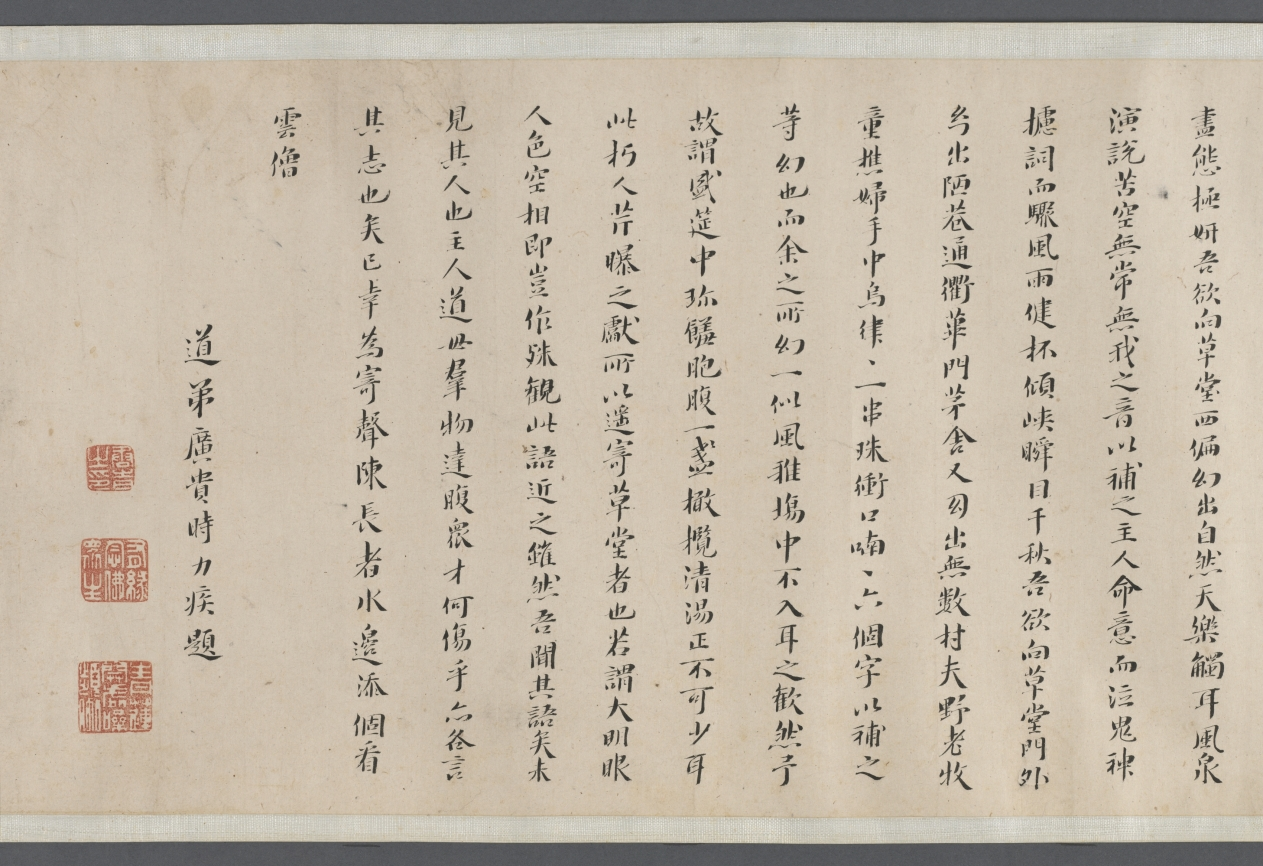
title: Spring Rain Thatched Hut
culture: China, Qing dynasty (1644-1911)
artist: Wang Jianzhang (Chinese, active 1621–1662)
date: 1650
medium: handscroll, ink on paper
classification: Drawing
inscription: Title by Wu Zhiying 吳芝瑛 (1868–1933), dated 1910.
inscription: 春雨草堂圖。庚寅仲春，為紫玄社兄畫於若耶溪上。 仲初王建章。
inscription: 12 colophons by Gong Weiliu’s 宮偉鏐 (1611–1680) contemporaries: Fang Gongqian 方拱乾 (1596–1667, jinshi of 1628); Jiang Cai 姜埰 (1607–1673); Liang Yizhang 梁以樟 (1608–1665); Du Shaokai 杜紹凱 (also named Du Jie 杜岕, 1617–after 1689), dated 1648; Zhao Kaixin 趙開心 (d. 1663), dated 1647; Zhao Erbian 趙而忭 (d. 1658); Yu Yaoguang 余耀光, dated 1649; Yao Quan 姚佺, dated 1648; Chen Taisun 陳台孫 (b. 1611, jinshi of 1640); (Monk) Shao 韶; Du Zhujin 杜祝進; and Tang Shi 唐時.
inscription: 此研田莊居士王建章為先太史紫元公所作春雨草堂圖也。居士字仲初，明崇禎間人，與先太史及惲香山相友善。喜畫佛像，自謂不讓李公麟。山水祖述董源，筆力雄健，有不可羈勒之概。香山稱其墨有五采，非世人所知。然性廉重，非同志不輕落筆，人得其寸圖尺縑，必相與忻賞，如獲蜼彝兕敦，非人世間物也！見先太史筆記，此圖寫雨景，而氣韻生動，勃勃於不能止。每一展覽，覺滿紙雲烟，墨瀋猶濕，如寫吾先人胸中未盡之邱壑也。圖後題詠，多一時名手，想見文采風流之盛。迄今二百餘年，舊德先疇，遺風未沫。吾子孫其永寶之，如與吾先人接謦咳於一堂，為感思之助，其敢作圖畫觀乎！同時香山亦有圖佚去己久，不知異日能為延津之合否。壬申長夏本昂重裝敬識。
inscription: Collectors' seals including: Gong Ben'ang 宮本昂 (1821–1874); Lian Qian 廉泉 (1868–1932); Wu Zhiying 吳芝瑛 (1868–1933)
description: With its striking simplicity, this painting captures the pure serenity of a private garden in the moist atmosphere of a spring morning on a small river. Painted in the style of Ni Zan, Wang Jianzhang dedicated this work to his patron-friend Gong Weiliu (1611-1680). Gong retired from government service after the fall of the Ming dynasty and constructed a garden-retreat at his native home in Taizhou, Jiangsu province. He invited scholars and poets from his literary society to contribute writings of his estate, which are here mounted together with the painting in this scroll.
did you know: Gong Weiliu, the owner of the estate portrayed here, had received his prestigious jinshi degree in 1643, but his official career was thwarted by the collapse of the Ming dynasty the following year.